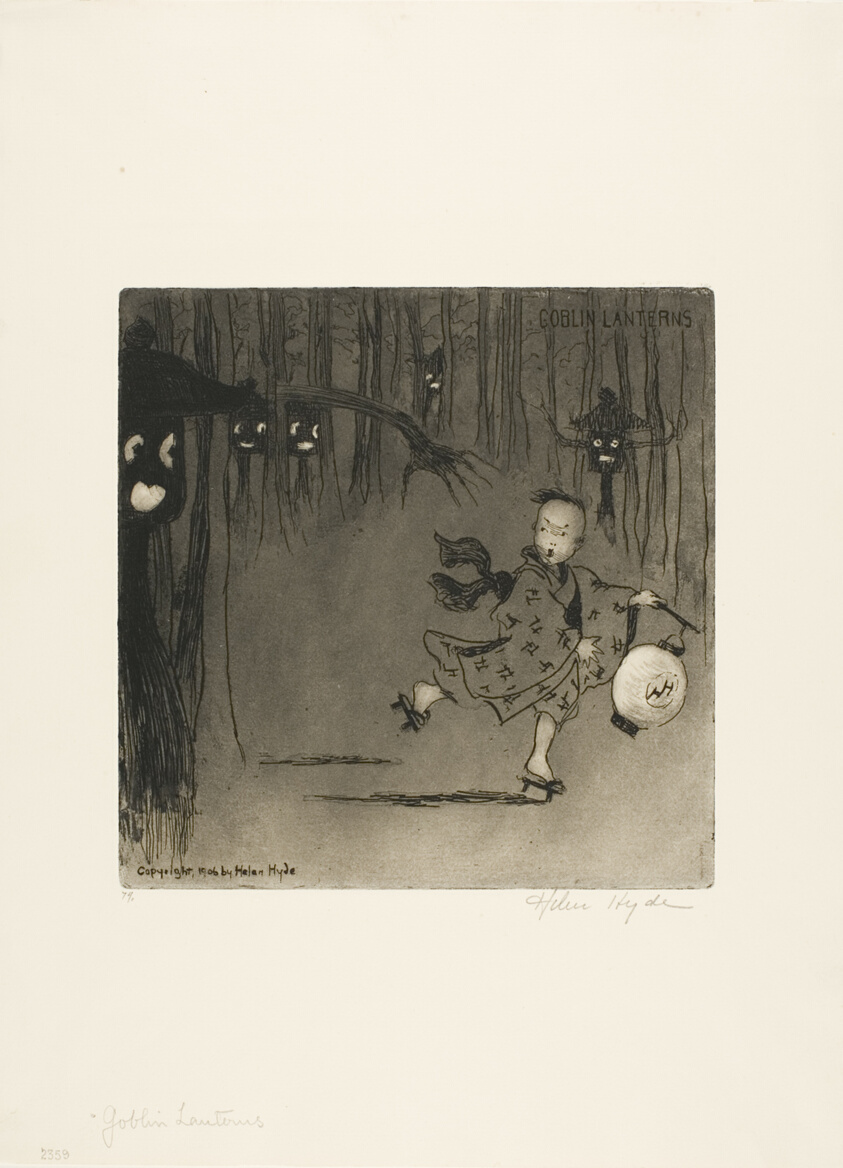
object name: Print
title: Goblin Lanterns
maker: Helen Hyde (American, 1868-1919)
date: 1906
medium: Aquatint on paper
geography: United States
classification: etching; print; prints and drawing